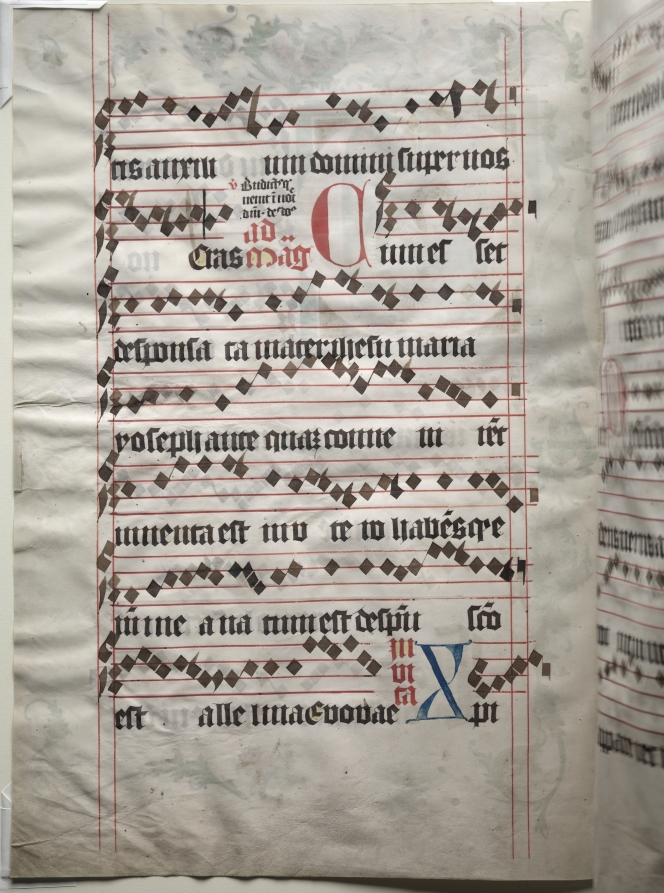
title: Bifolio from an Antiphonary: Historiated Initial O with the Nativity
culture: Bohemia, Prague, 15th century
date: early 1400s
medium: ink, tempera, and gold on parchment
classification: Manuscript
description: This splendid bifolium (a sheet folded in half to form two leaves) once formed part of an important antiphonary produced for an unidentified Benedictine monastery in Bohemia. With its rich illumination, it provides an important example of Bohemian painting during the opening years of the 15th century as well as painting in the city of Prague, one of the great court centers of Europe. The decoration of the leaf is dominated by a majestic initial O that depicts the Nativity. A scene in the background shows the angel Gabriel’s Annunciation to the Shepherds. The initial itself is placed within a square frame outside of which a single Benedictine monk observes the sacred event. The initial introduces the Latin chants for the first vespers of Christmas Day: O iuda et iherusalem (“Oh Judea and Jerusalem”). Framing the text are luxurious, scrolling acanthus leaves. Within the upper margin, two prophets emerge from the lush, foliated tendrils to observe the nativity below. In this way, the foretelling of the birth of Christ in the Old Testament is established visually.